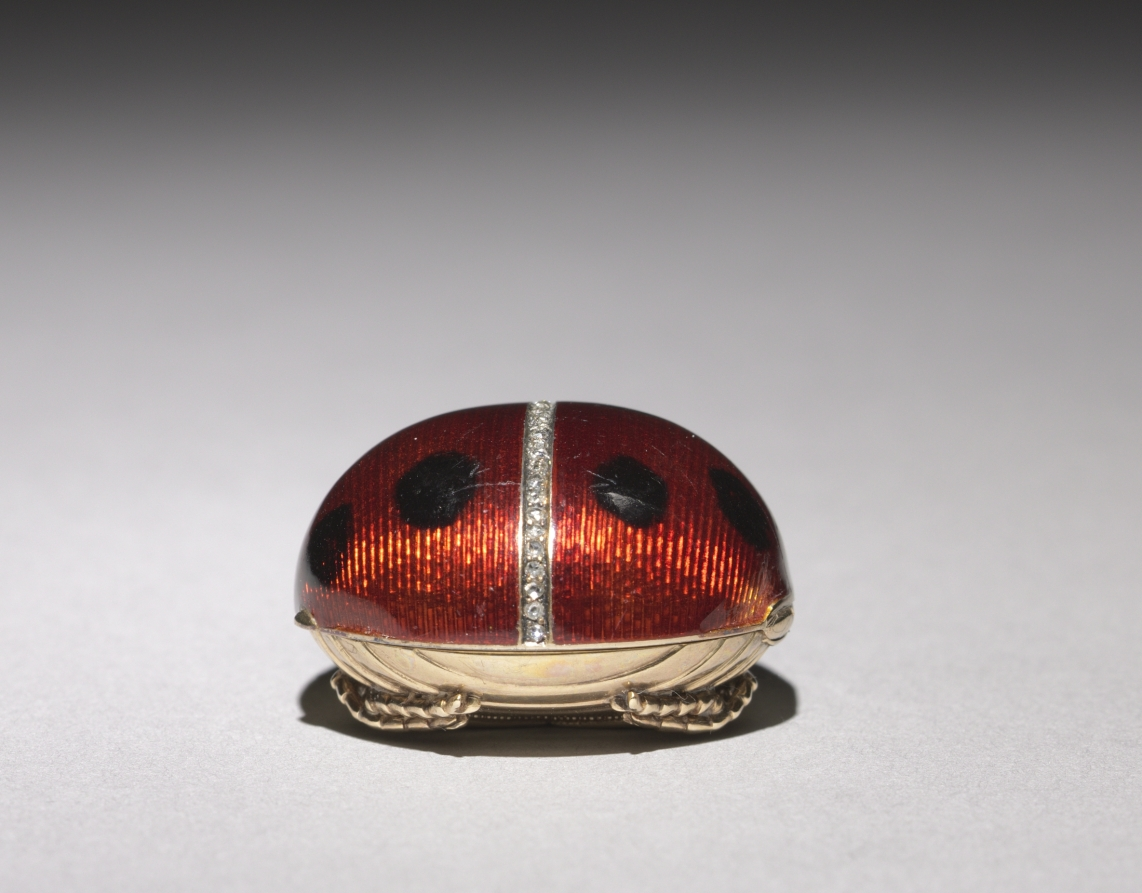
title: Ladybird Beetle Pillbox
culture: Russia, St. Petersburg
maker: House of Fabergé (Russian, 1842–1918)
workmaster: Mikhail Evlampievich Perkhin (Russian, 1860–1903)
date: 1896–1903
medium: gold, enamel, diamonds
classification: Miscellaneous